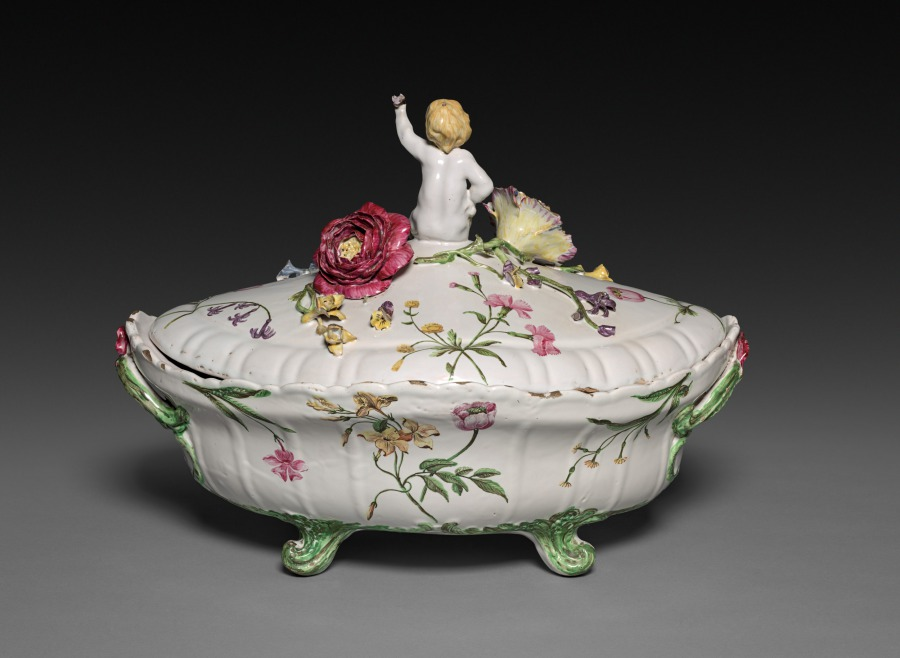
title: Covered Tureen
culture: France, Marseilles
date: c. 1760–70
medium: faience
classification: Ceramic